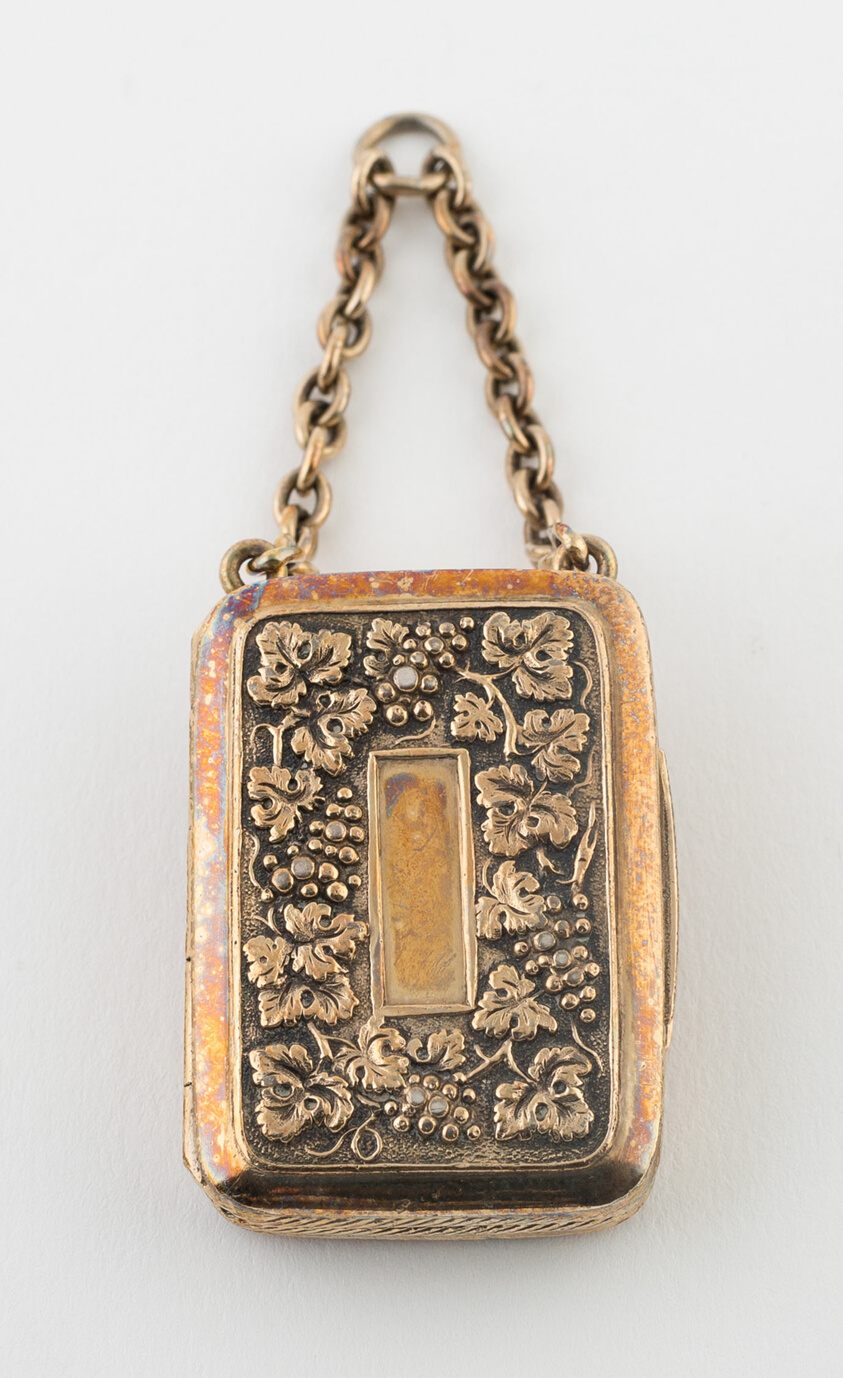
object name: Metalwork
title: Vinaigrette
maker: John Shaw; Birmingham, England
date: 1816/17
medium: Silver gilt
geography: Birmingham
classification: vinaigrette (container for health care); container for personal use; box; european decorative arts; metalwork; silver; decorative object/ornament